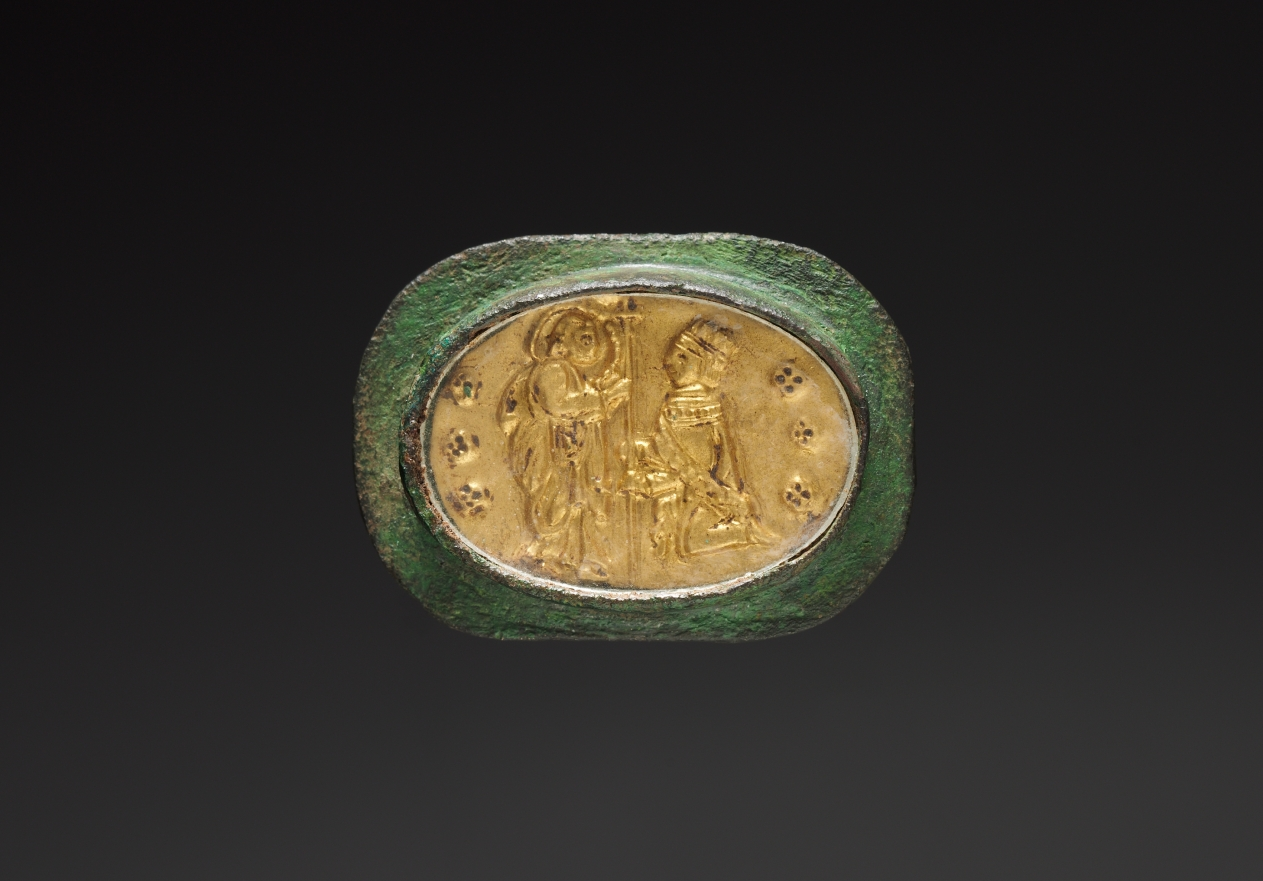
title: Votive or Civic Badge with a Crowned Figure Kneeling before Christ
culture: Italy, Venice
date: c. 1300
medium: gold repoussé medallion under glass inset within a bronze clasp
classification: Metalwork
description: This brooch was probably made to fasten a ceremonial cloak, and may have been intended as a diplomatic gift or memento. The central composition parallels the main face of the famous gold coin, a ducat, of the Venetian Doge Giovanni Dandolo minted in 1288-1289. Unlike the coin, the medallion is neither struck or diecast; it is tooled and chased, making it one of a kind.